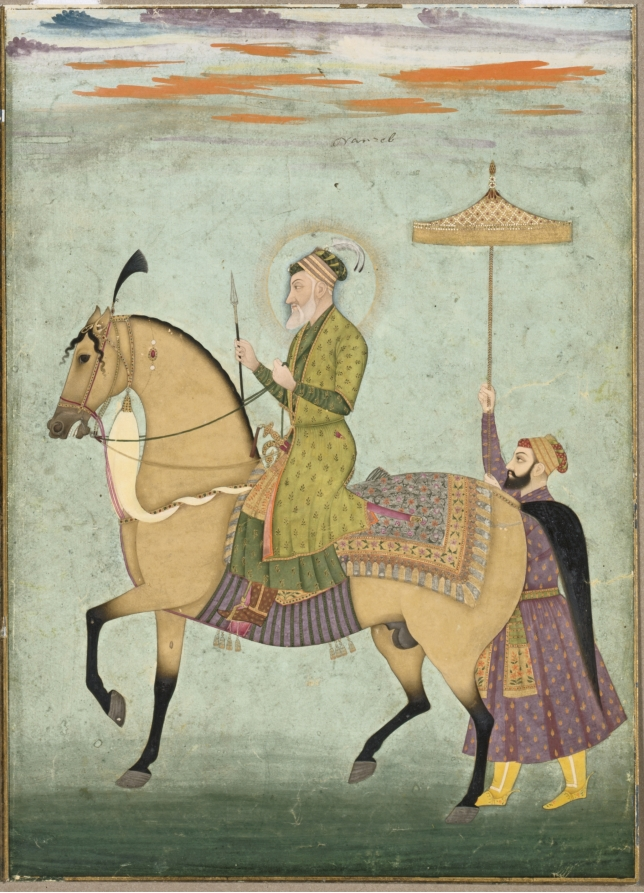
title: The Emperor Alamgir (reigned 1658–1707) on Horseback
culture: India, Mughal Dynasty (1526-1756)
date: c. 1690–1710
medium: Gum tempera, gold, and silver on paper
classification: Painting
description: The equestrian portrait genre was inspired by gifts of European prints and paintings to the Mughal court. The sixth Mughal emperor is portrayed on an elegant, decorated steed, ready for battle, holding a spear, and his sword at the ready. His attendant holds the symbolic parasol over him, which is a millennia-old emblem of kingship in India. Throughout his long reign he was primarily occupied with the conquest of the Deccan, which he ultimately achieved, expanding the Mughal Empire to its greatest geographical extent.